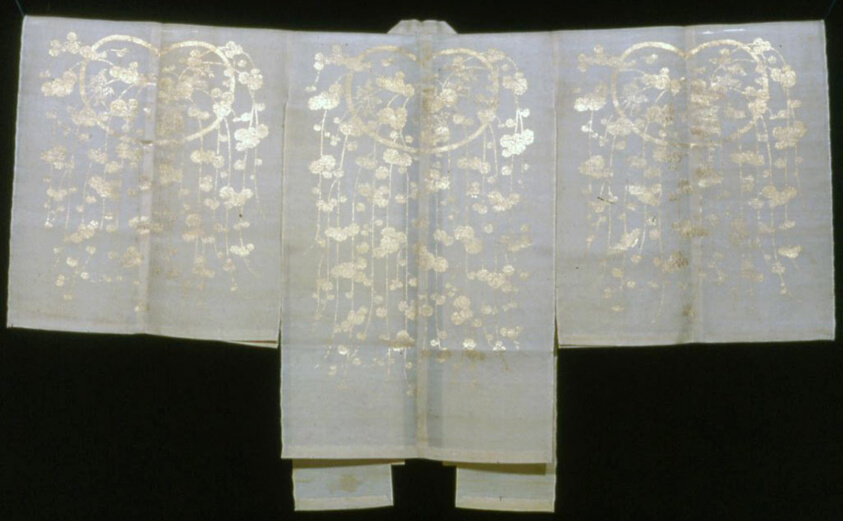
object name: Textile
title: Chôken (Noh Costume)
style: meiji, taisho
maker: Japan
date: 1901/25, Meiji period (1868–1912)/ Taishô period (1912–1926)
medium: Silk and gold-leaf-over-lacquered-paper strips, complex gauze weave with supplementary brocading wefts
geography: Japan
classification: textile; weaving; kimonos